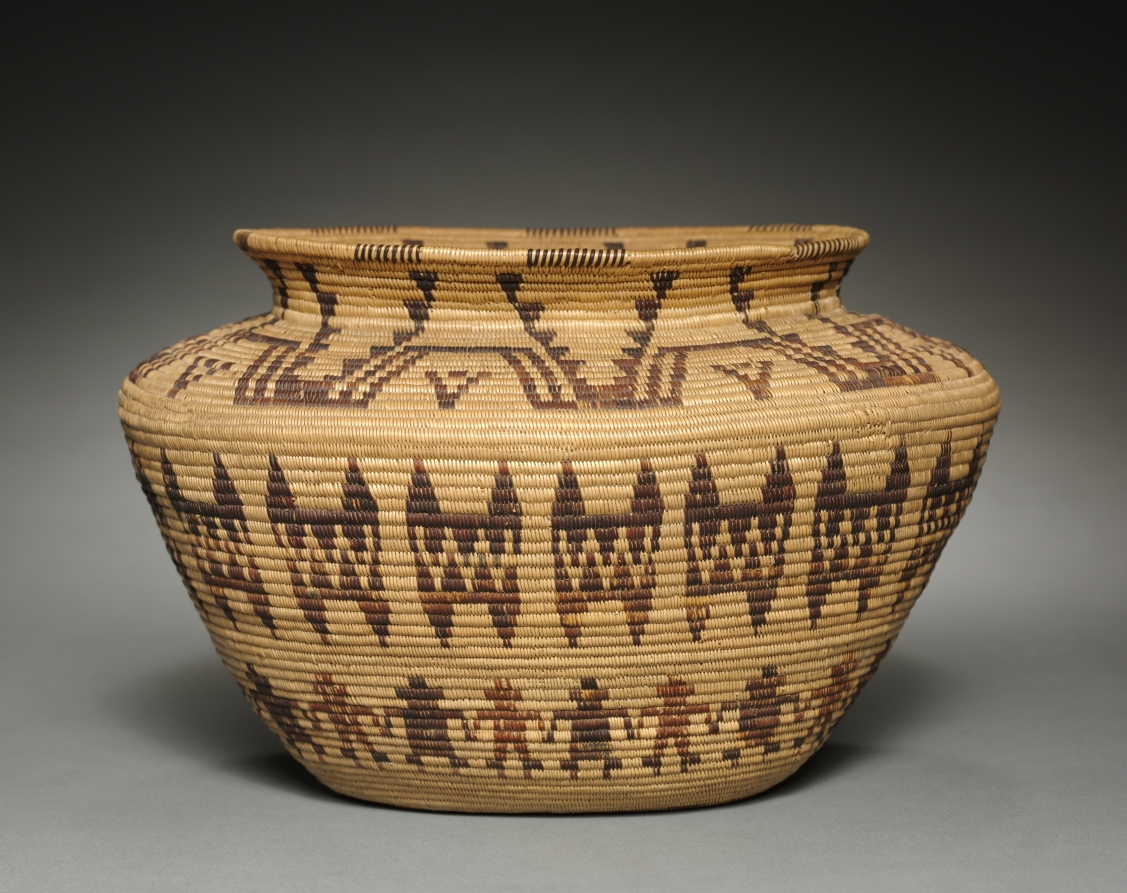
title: Jar-shaped Basket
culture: Native North America, Great Basin, California, Death Valley, Timbisha (Panamint) Shoshone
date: c. 1900–1910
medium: willow, bulrush, yucca root; coiled (3 rods)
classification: Basketry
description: The figures woven in the lower register of this basket were borrowed from basketry of the Yokuts, a California group that lived to the west of Timbisha (Panamint) Shoshone territory.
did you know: The figures woven in the lower register of this basket were borrowed from basketry of the Yokuts.